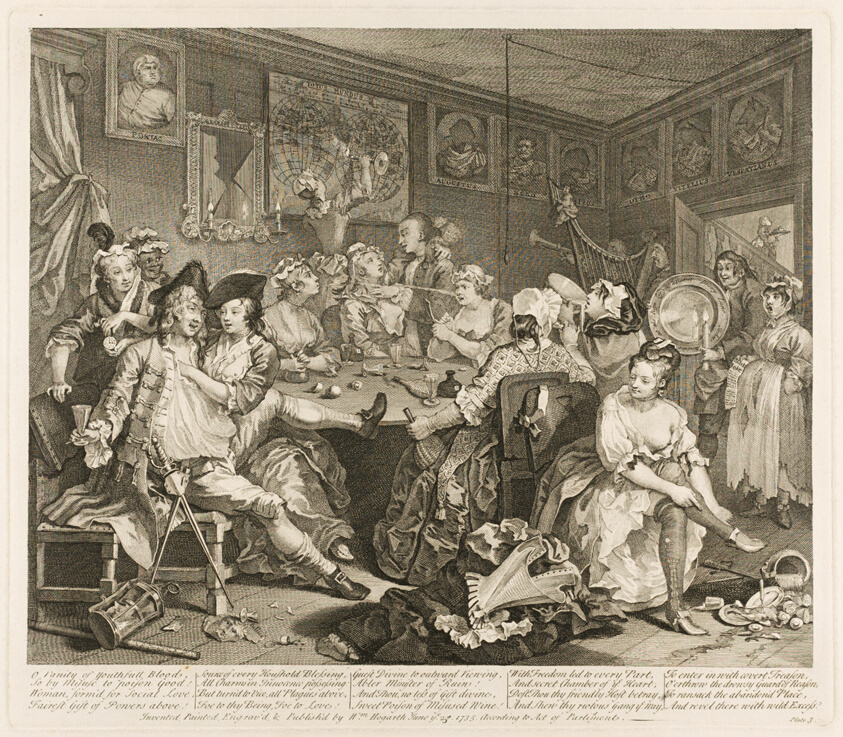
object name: Print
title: Plate Three, from A Rake's Progress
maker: William Hogarth (English, 1697-1764)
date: June 1735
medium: Etching and engraving in black on ivory laid paper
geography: England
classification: etching; print; prints and drawing